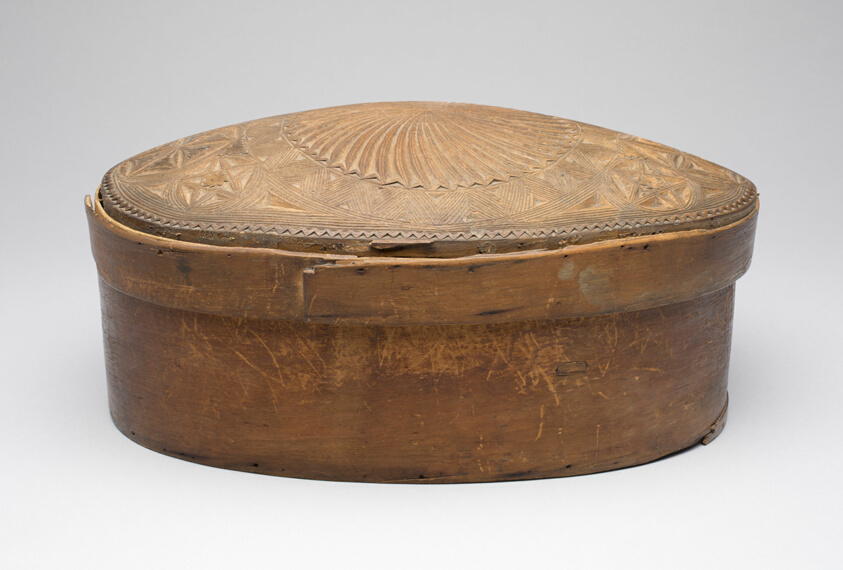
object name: Decorative Arts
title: Box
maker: Artist unknown (American, 18th–19th century)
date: 1790–1860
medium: Wood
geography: United States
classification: box; american decorative arts; american arts; decorative arts